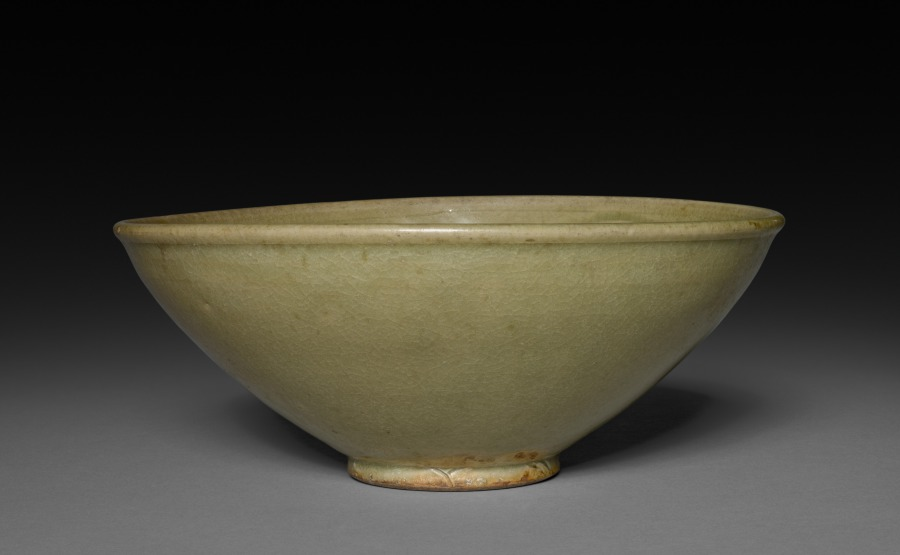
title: Bowl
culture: China, Jin dynasty (1115-1234)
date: 1100s-1200s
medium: Glazed light gray porcelain, Northern Celadon ware, Yaozhou type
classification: Ceramic